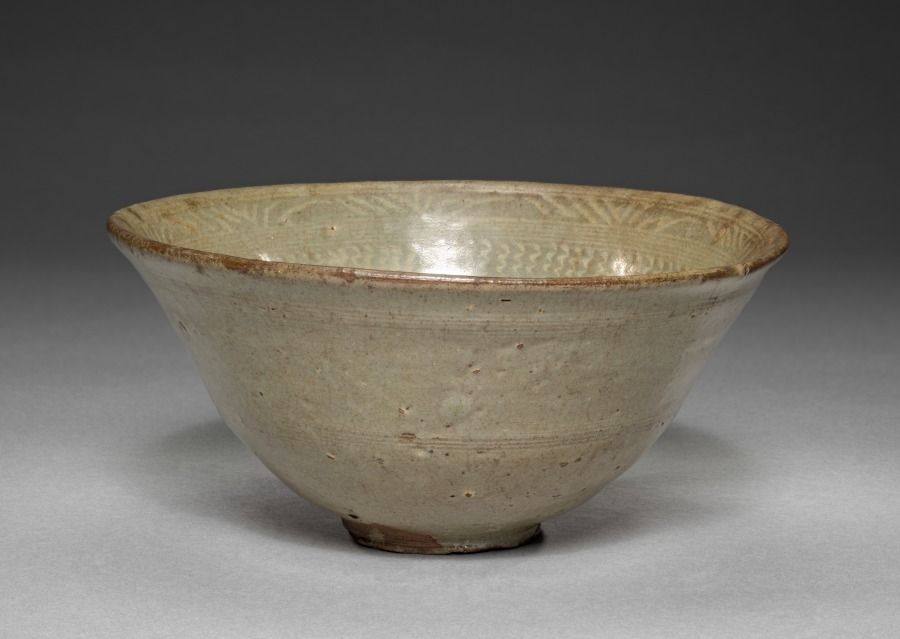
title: Bowl with Stamped Floral Decoration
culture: Korea, Joseon dynasty (1392–1910)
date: 1400s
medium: glazed ceramic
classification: Ceramic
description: This type of wide-mouthed bowl was used every day in Korea, not exclusively for tea drinking. But when it was introduced to Japan around the early 16th century, its imperfect appearance evoking the aesthetics of wabi-sabi caused it to be repurposed as a tea bowl. Korean tea bowls were circulated as an item of foreign luxury among Japanese military elites. Many Korean potters were abducted to japan during the Japanese invasions (1592–98) and some settled down in Japan, particularly in the Saga prefecture in Kyushu. A Japanese tea bowl such as 1983.158 in the CMA collection is one example possibly created by the descendants of dislocated Korean potters.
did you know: This type of humble tea bowl was highly praised among Japanese collectors for its imperfect beauty.